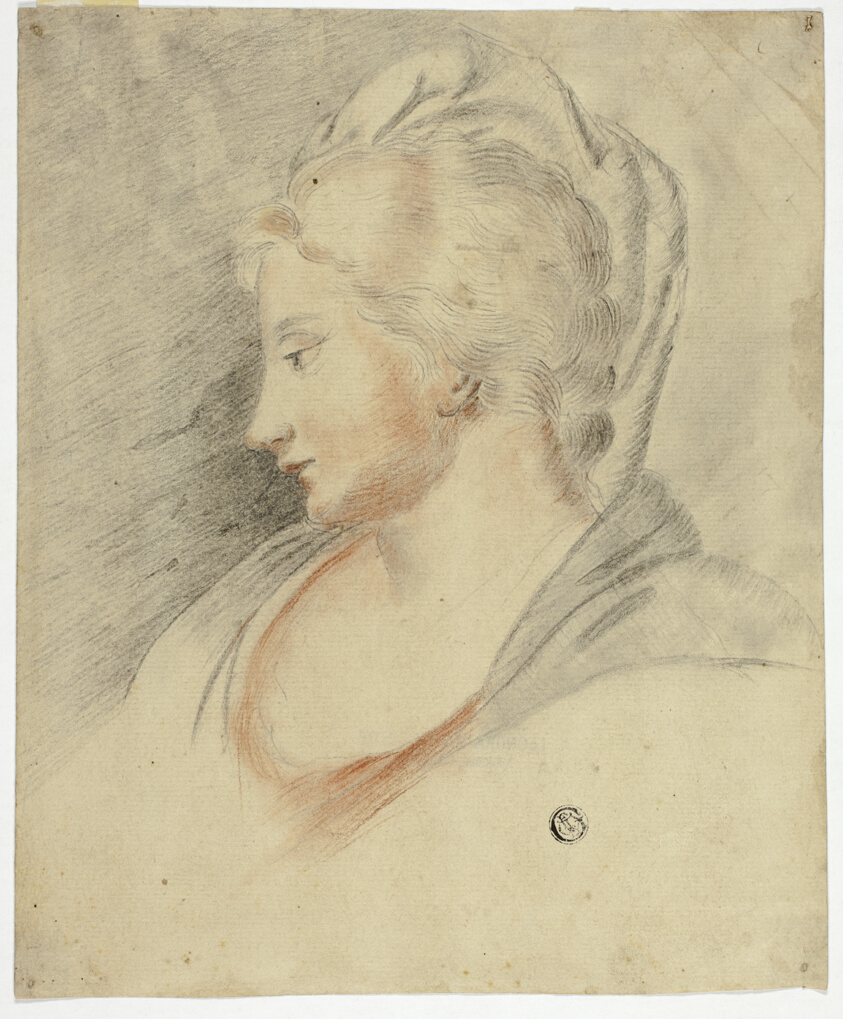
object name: Drawing and Watercolor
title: Profile Portrait of Woman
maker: Unknown Artist; French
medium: Black and red chalks, with stumping, on cream laid paper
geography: France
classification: chalk; drawings (visual works); prints and drawing